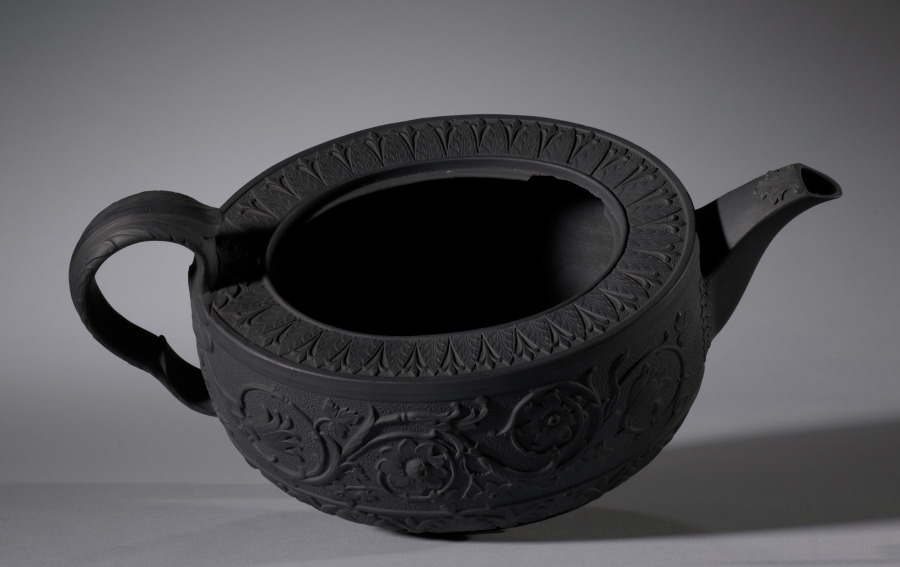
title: Teapot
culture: England, 19th century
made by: Elijah Mayer & Son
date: c. 1810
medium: black basalt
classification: Ceramic